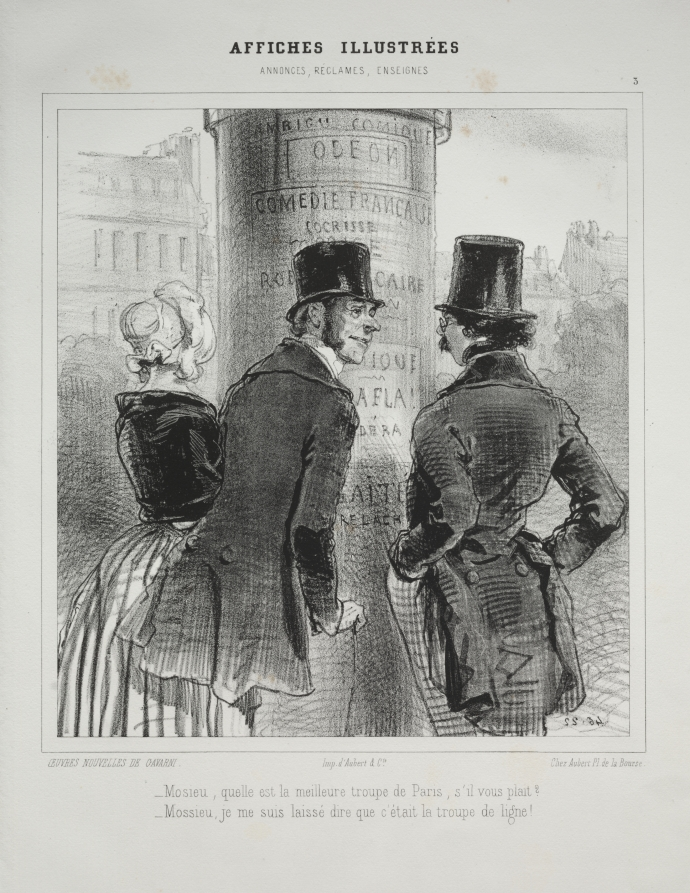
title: Affiches Illustrées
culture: France, 19th century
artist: Paul Gavarni (French, 1804–1866)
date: c. 1844–46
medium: lithograph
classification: Print